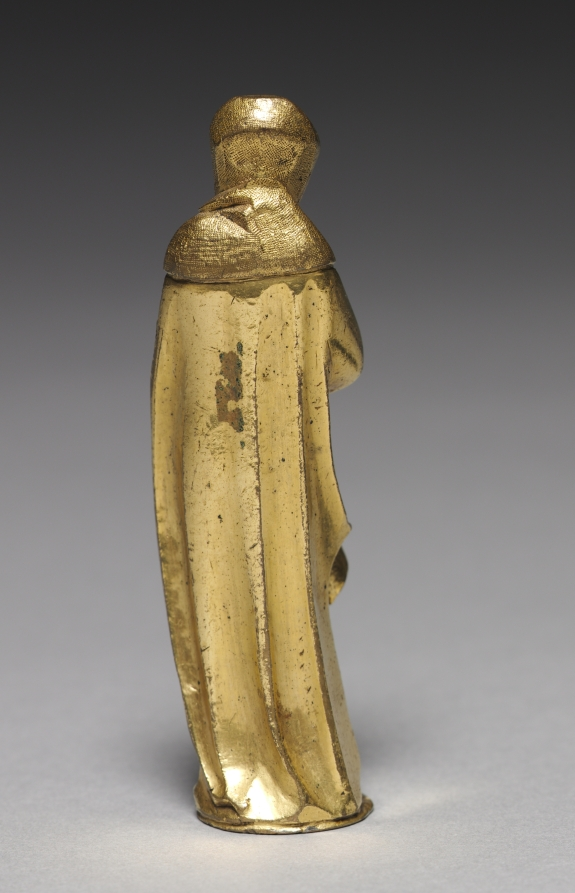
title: Mourning Virgin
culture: Germany, Franconia, late 15th century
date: late 1400s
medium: gilt bronze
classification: Sculpture